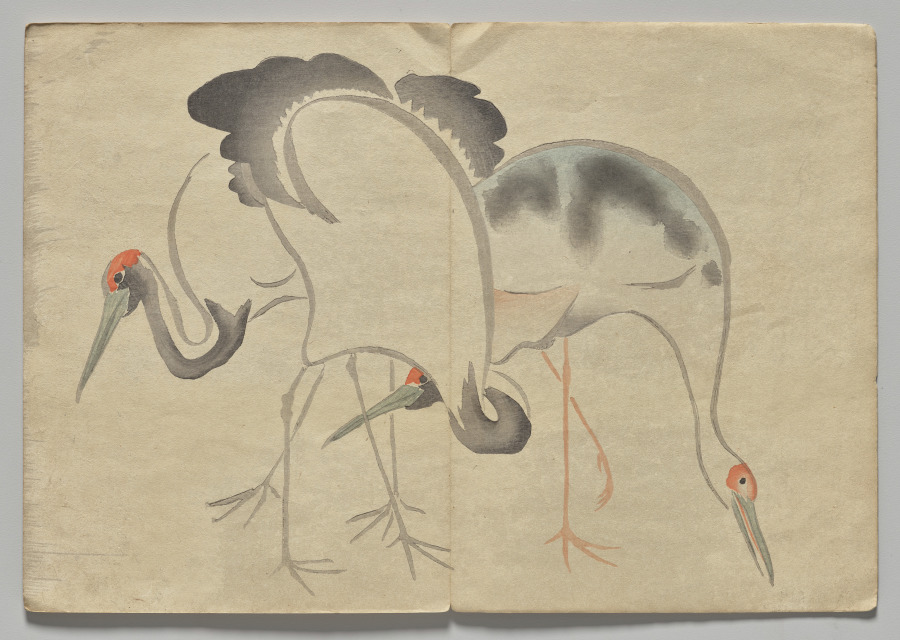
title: Scene from The Kōrin Picture Book (Volume 2)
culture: Japan, Edo period (1615–1868)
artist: Nakamura Hōchū (Japanese, d. 1819)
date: 1800s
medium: color woodblock printed book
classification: Bound Volume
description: Ogata Korin (1658-1716) was one of the most admired artists of Rimpa, or "decorative school painting." These books by the charming later-generation Rimpa artist Hochu record Korin's inventive designs.